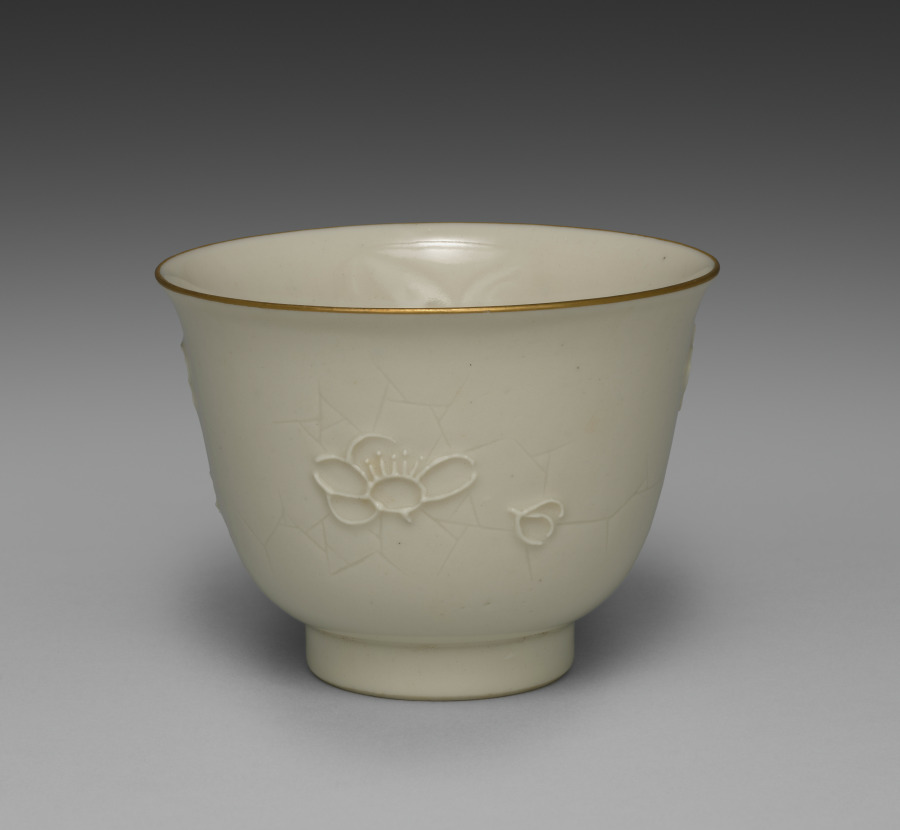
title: Drinking Cup from Dining Set with Plum Blossoms and Cracked-Ice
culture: Japan, Meiji period (1868–1912)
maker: Seifū Yohei II (Japanese, 1844–1878)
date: c. 1875–78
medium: Porcelain with molded designs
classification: Ceramic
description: Each item in this set has a delicate low-relief design of flowering plum branches over scattered, intersecting lines meant to resemble the cracked-ice surface of a frozen body of water and is signed on the base in gold pigment. While Yohei II produced many fine works in underglaze blue, like those produced by Kiyomizu Shichibei, he also made works in quite different styles later in his career, from the early 1870 s. In 1873, he was appointed purveyor to the Industrial Center of Kyoto Prefecture, a designation associated with Kyoto’s efforts to reach an international market through the port of Kobe; and from 1875 until his death, he was involved in national-level projects to present Japanese ceramics across the world. It was during this period that Yohei III was apprenticed to Yohei II, and it has been suggested that this set may in fact be an early example of Yohei III’s work, which he signed with his teacher’s name. Decorated with flowers resembling Japanese textile motifs, the set calls to mind the design of Yohei II’s pair of vases with plum blossoms in the Victoria and Albert Museum. Here, the elaborate trees created for a formal public exhibition setting have been translated into the approachable blossoms of the genteel domestic environment. While the designs are consistent across the pieces, each raised flower petal and pistil and each incised line in the ice was done by hand, so the cups, bowls, and dishes are similar yet unique. The bottoms of two boxes once identified the set’s owner, but the information has been deliberately obscured with black ink. However, inscriptions still visible appear to indicate two occasions, once at the end of July 1886 , and once again in June 1916 , when parts of the set were requested from Hokura in Niigata Prefecture. The location corresponds to a neighborhood in the present-day city of Jōetsu. The surname Tsuji 辻 also appears on a paper tag affixed to one of the box cloths. Future research may possibly reveal more about their provenance. A vase by Yohei III in a private collection combines the formal grandeur of the Yohei II vases in the Victoria and Albert Museum with the gentler design of this dining set, placing flowering plum trees against soft, scalloped-edge clouds resembling those in golden screens.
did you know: The dining wares have a creamy white coloration that the four boxes containing them identify as Korean in style.